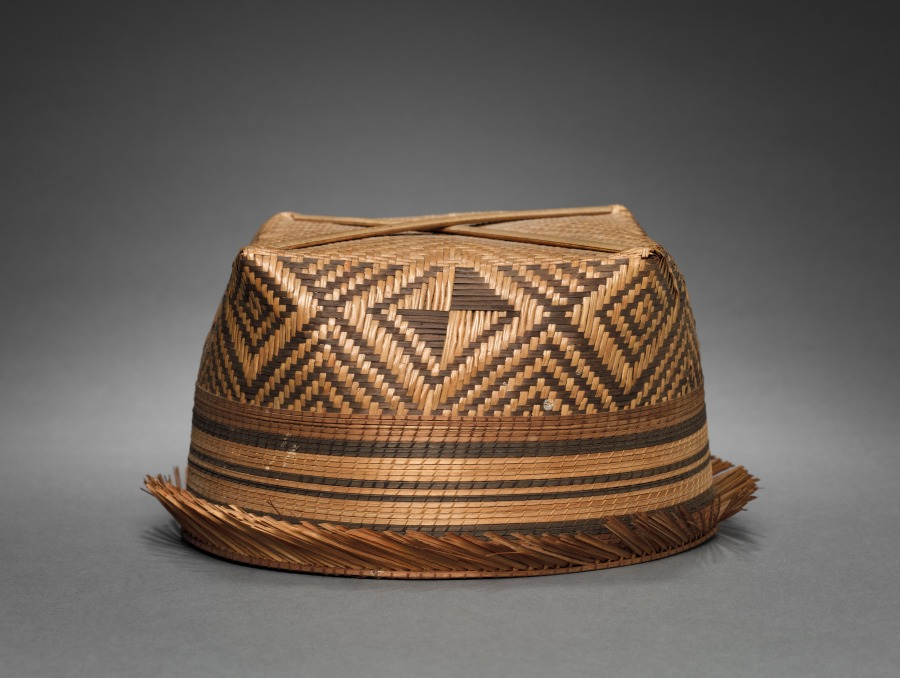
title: Hat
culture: Africa, Central Africa, Democratic Republic of the Congo, Mangbetu-style maker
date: by 1928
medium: Plant fibers and dye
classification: Garment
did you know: This woven hat looks brand new because it was one of the many items the business-savvy chief of Ekibondo had artists and artisans make for the foreigners who passed through his village.